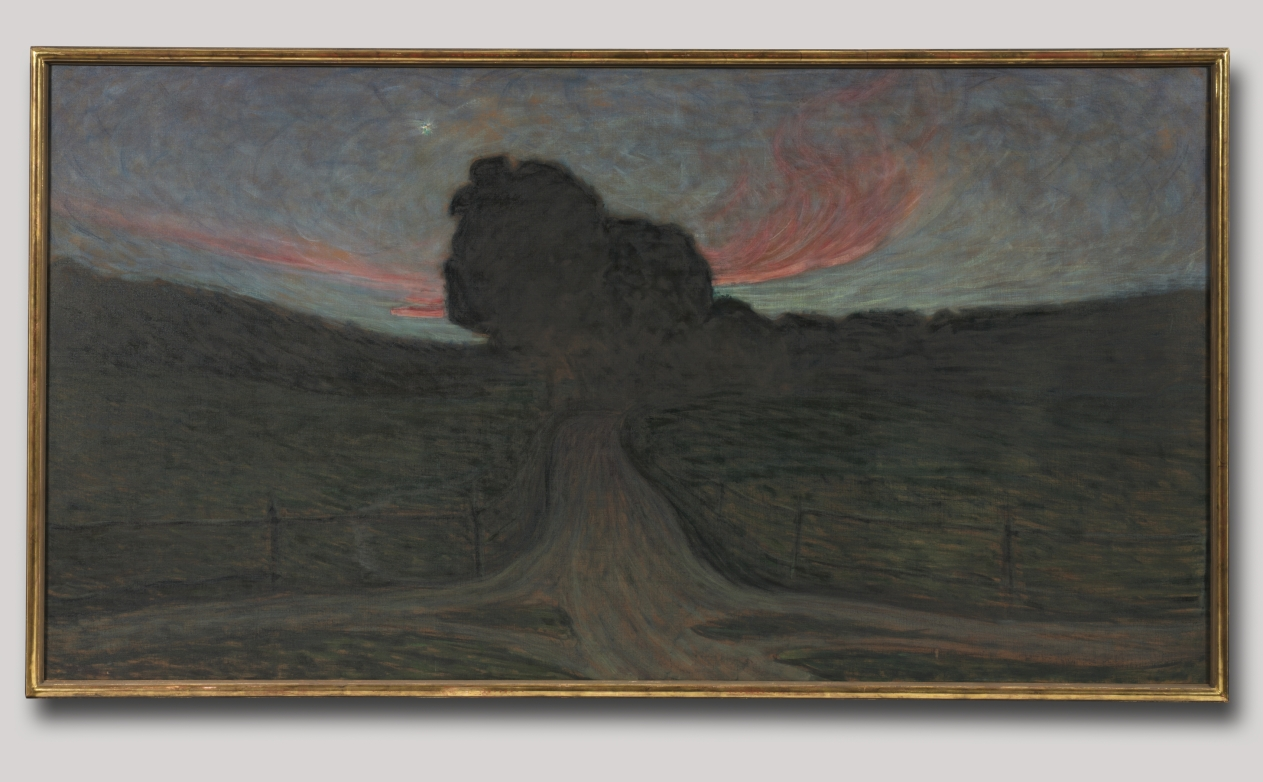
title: Evening Mood-Lidingö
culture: Sweden, 20th century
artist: Eugène Jansson (Swedish, 1862–1915)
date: 1900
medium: oil on canvas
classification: Painting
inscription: Unsigned; inscribed on the stretcher in blue ink, "A. Jansson' (the artist's brother) and "HERR R. BERGH, 40 BAS 4 TR OG JANSSON'. Inscribed on the stretcher in red ink "G.J.'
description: The swirling brushstrokes and telescopic perspective in this view of a field near Stockholm, Sweden, converge on the dark mass of trees and dying sunset in the center. Feelings of melancholy and loneliness are relieved only by the appearance of the first evening star. Although little known in the United States, Eugène Janssen was one of the most important artists of Scandinavian modernism. He became aware of the works of the Norwegian Symbolist Edvard Munch as early as 1884 and shared Munch’s ambition of exploring psychological states of mind rather than adhering to external appearances.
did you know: Jansson, known as the "Blue Painter," was called "Paraffin Jansson" by other artists because the light in his paintings reminded them of the light from the paraffin (kerosene) lamps widely used in houses at the time.